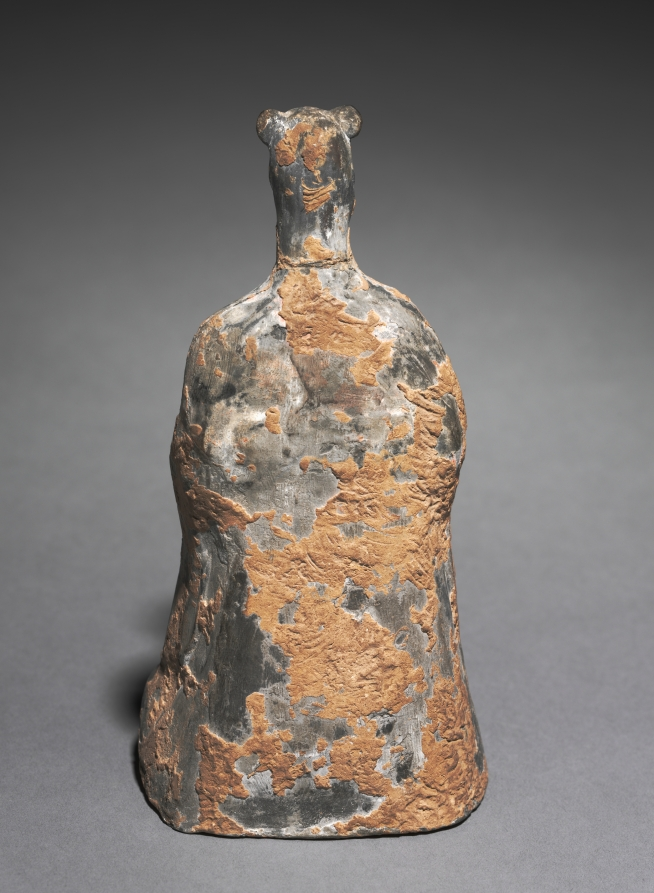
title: Mortuary Figure of the Zodiac Sign: Monkey (Sagittarius)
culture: China, Northern Wei dynasty (386-534)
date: 500s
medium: gray earthenware with traces of slip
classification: Sculpture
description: The twelve-animal zodiac series—rat, ox, tiger, rabbit, dragon, snake, horse, goat, monkey, rooster, dog, and boar—signifies a traditional Chinese concept of time structured in a cyclical order. The twelve animals are also linked to the art of fortune-telling that underlies human existence in connection with the changes of the universe. The use of the twelve zodiac animals as tomb furniture suggests they provided a cosmological structure for the afterlife.